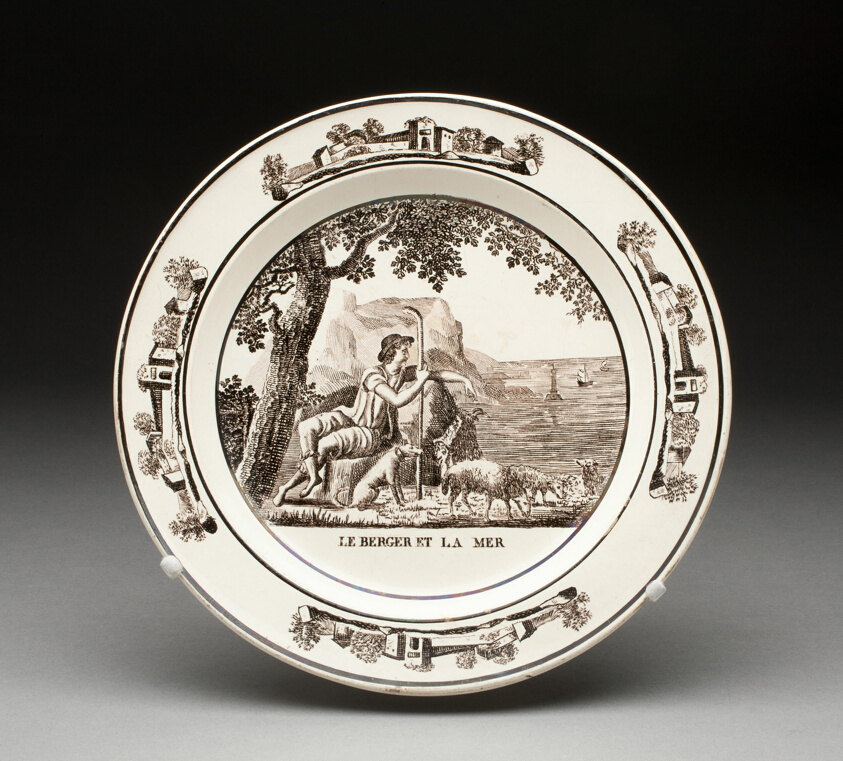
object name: Ceramics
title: Plate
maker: Montereau Pottery (French, 1774-1840)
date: 1800/25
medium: Earthenware, transfer-printed (creamware)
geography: Montereau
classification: plate (general, dish); earthenware; dish (vessel); european decorative arts; ceramics; creamware